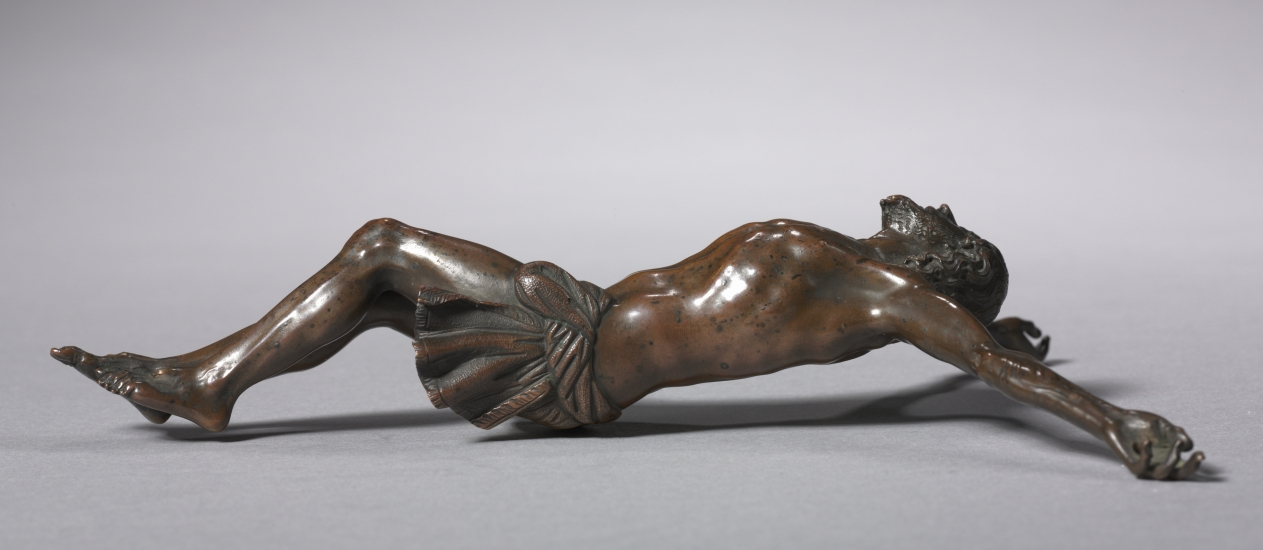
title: Christ Crucified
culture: Italy, Florence(?), 17th century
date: c. 1600–1650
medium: bronze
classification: Sculpture